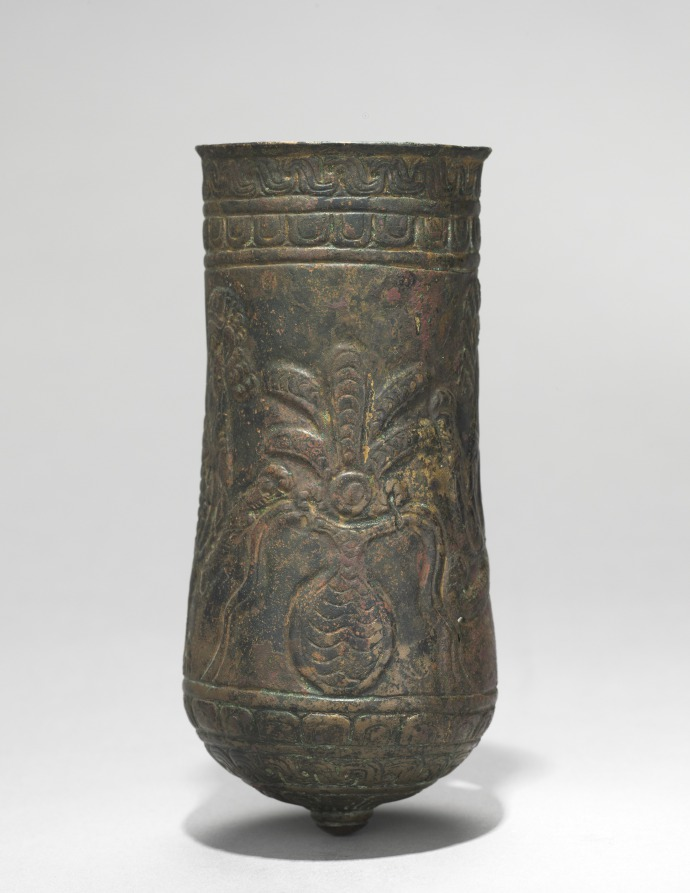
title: Button-Based Situla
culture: Iran, Luristan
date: 900–700 BCE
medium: bronze, repoussé, punched, incised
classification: Metalwork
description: The metalworkers of Luristan provided the Assyrian empire with elaborate bronze ornaments and vessels. These two situla are decorated symmetrically---one with ibexes drinking from an overflowing water jar; the other, with sphinxes.